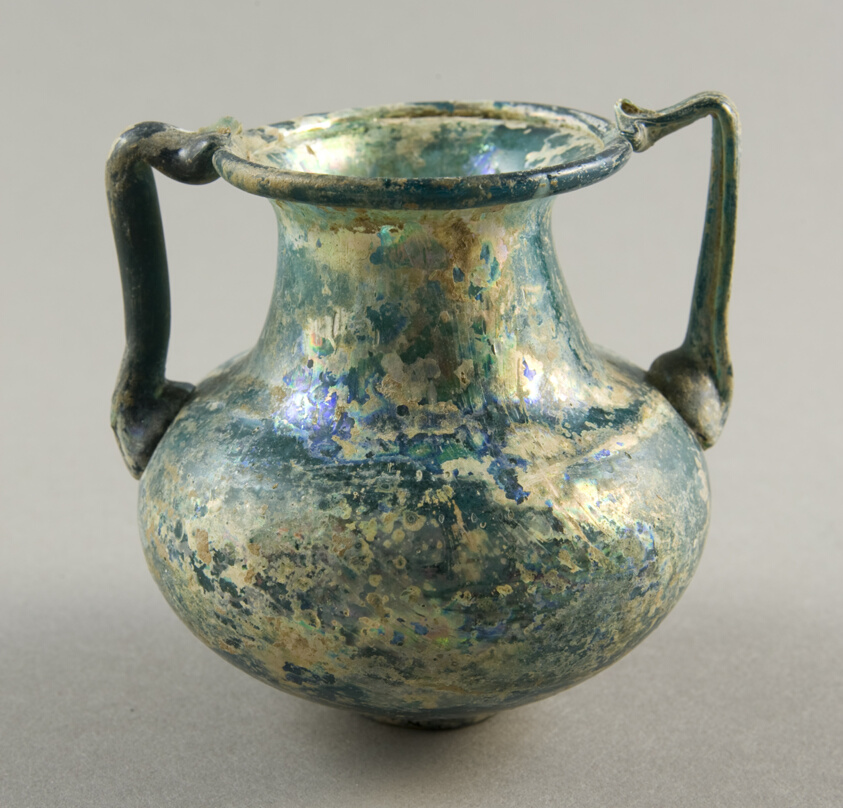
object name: Vessel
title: Jar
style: syrian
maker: Roman; Levant or Syria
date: 4th-5th century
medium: Glass, blown technique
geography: Syria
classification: vessel; glass; ancient art